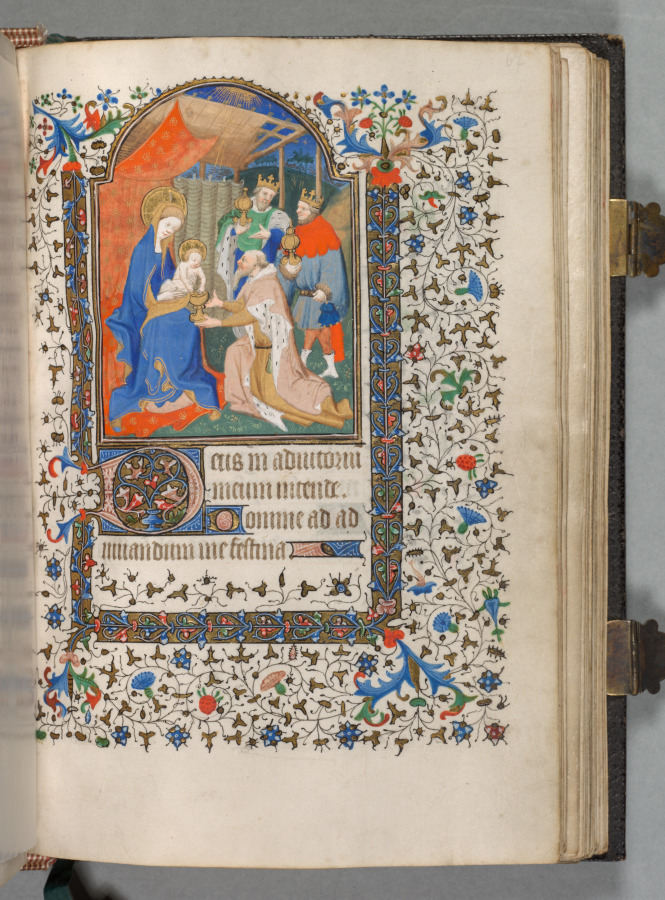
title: Book of Hours (Use of Paris): Fol. 67r, Adoration of the Magi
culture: France, Paris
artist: possibly studio or workshop of The Bedford Master (French, Paris, active c. 1405–30)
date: c. 1420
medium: ink, tempera, and gold on vellum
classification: Bound Volume